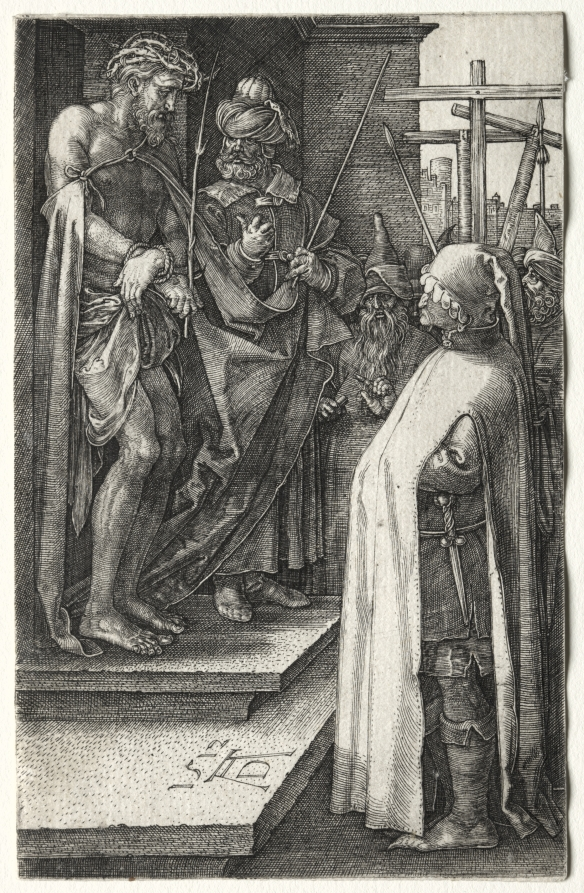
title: Ecce Homo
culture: Germany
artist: Albrecht Dürer (German, 1471–1528)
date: 1515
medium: engraving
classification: Print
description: This scene of the presentation of Christ to the people, or ecce homo (“behold the man”) from the Engraved Passion series exemplifies Albrecht Dürer’s instinct for the graphic possibilities of the engraved line. Working with a burin on a copperplate, he crossed lines at different angles and varied the thickness of the lines to create dramatic tonal areas and highly descriptive textures. In this closely cropped composition, the focus on Christ’s clenched and pained body as he stands in judgment before a crowd contrasts with the disinterest emanating from the man standing calmly before him.